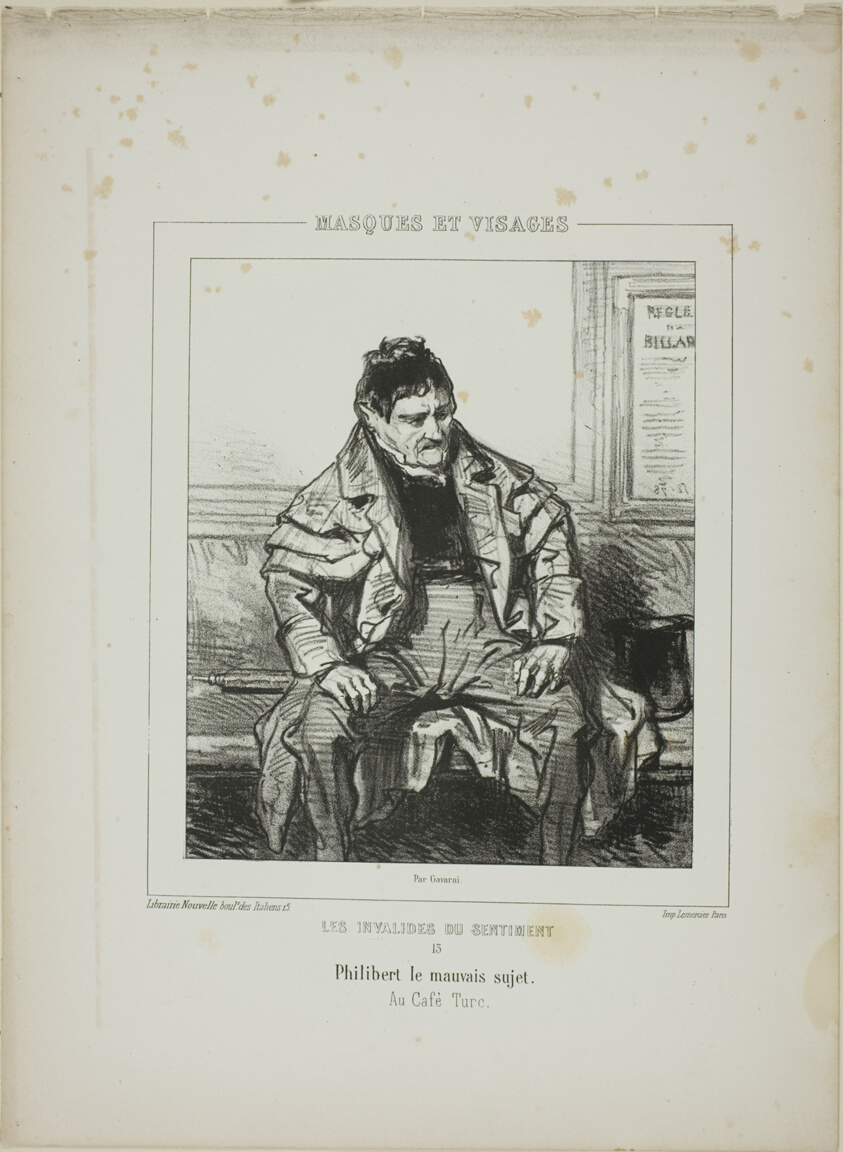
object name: Print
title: Les Invalides du Sentiment: Philibert le mauvais sujet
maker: Paul Gavarni (French, 1804-1866)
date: 1853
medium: Lithograph in black on cream wove paper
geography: France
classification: lithograph; print; prints and drawing